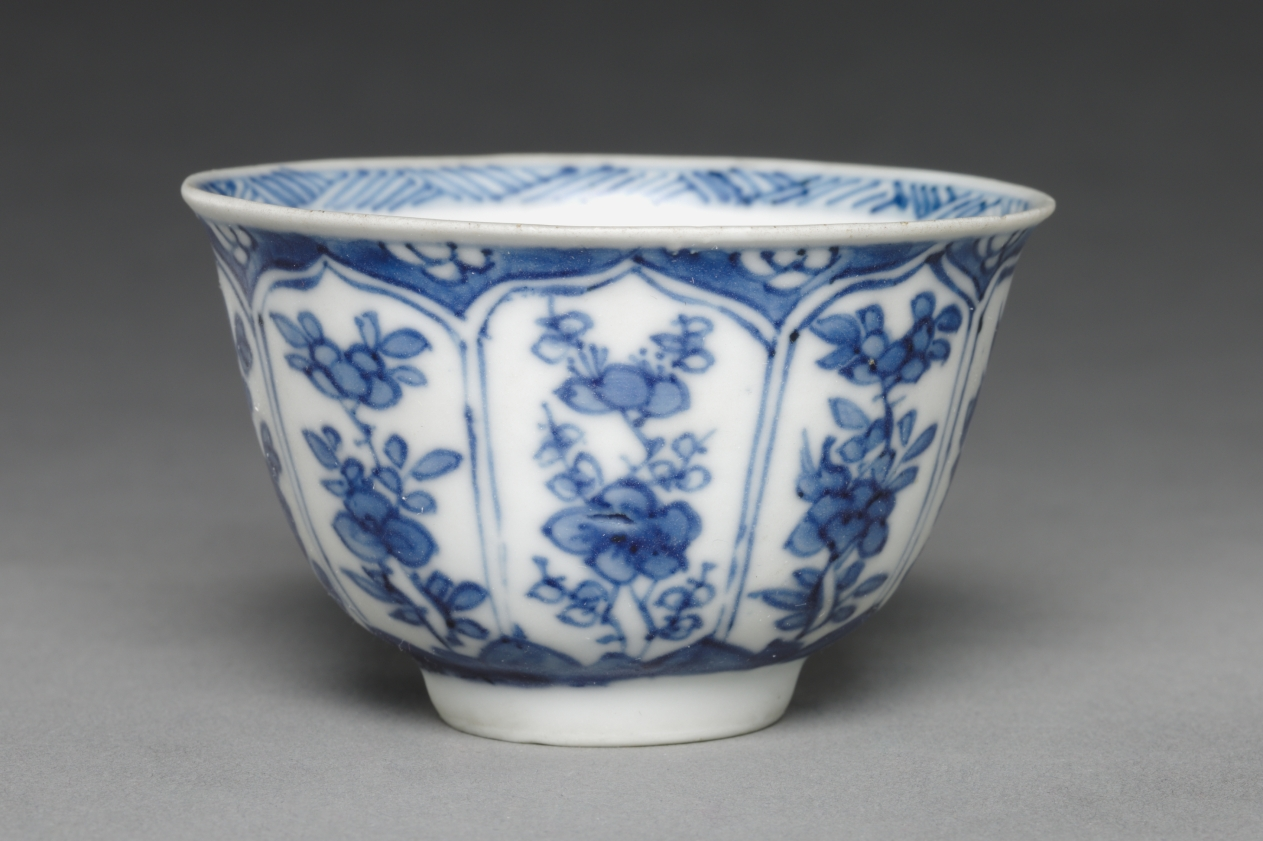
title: Tea Cup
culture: China, Qing dynasty (1644-1911)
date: c. 1690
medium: porcelain with blue and white decoration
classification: Ceramic